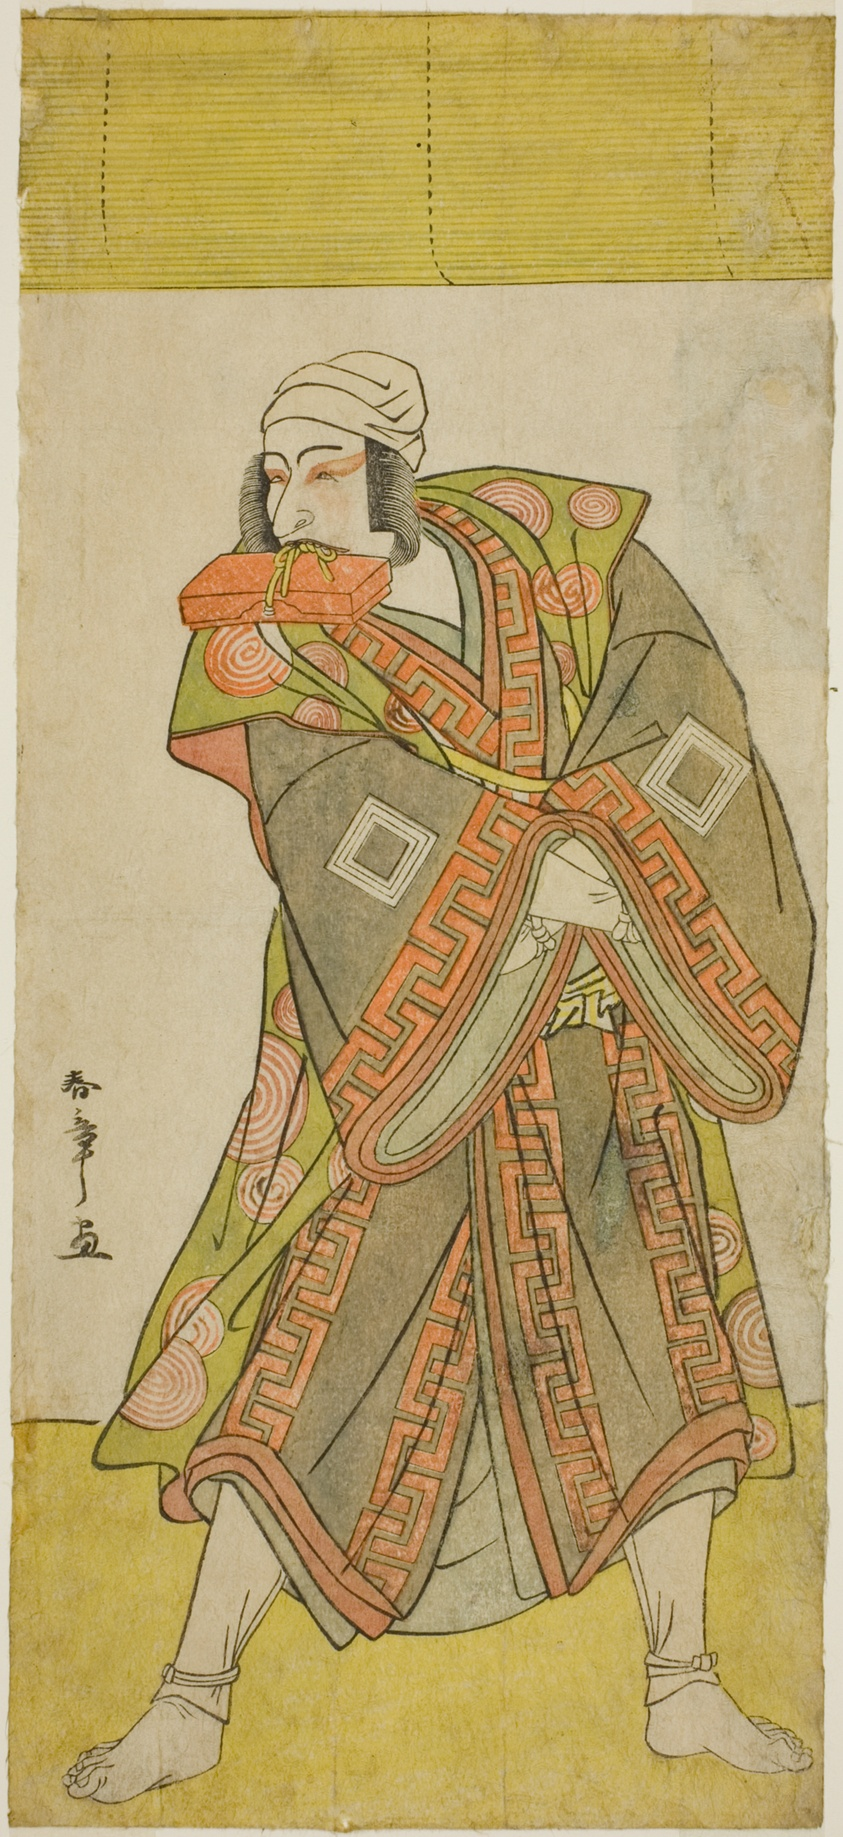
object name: Print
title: The Actor Ichikawa Danjuro V as Prince Koretaka Disguised as the Courier Izutsu Chuji, in the Play Yamato Kano Ariwara Keizu, Performed at the Nakamura Theater in the Fifth Month, 1781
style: Japanese (culture or style)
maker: Katsukawa Shunsho 勝川 春章; Japanese, 1726-1792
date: c. 1781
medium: Color woodblock print; hosoban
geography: Japan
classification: woodblock print; print; asian art